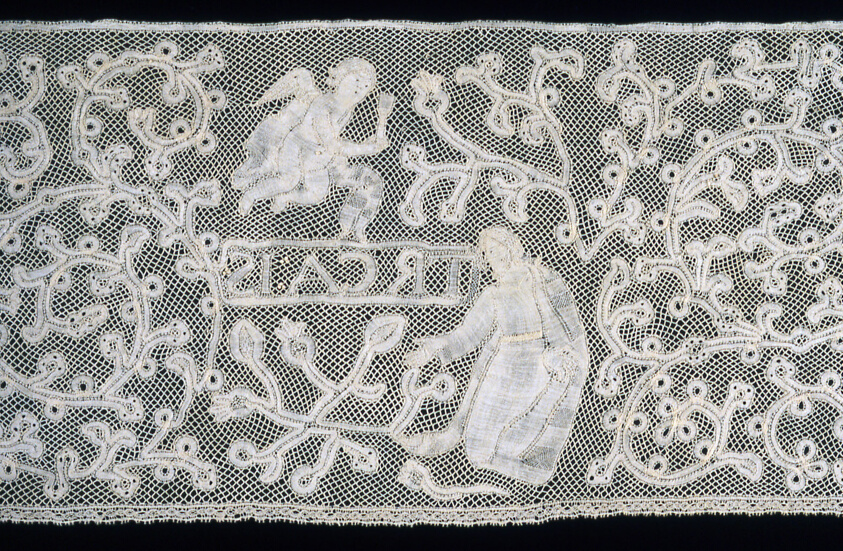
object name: Textile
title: Border (From an Altar Cloth)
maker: Italy, Milan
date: 1725/75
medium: Linen, bobbin part lace; embellished with glass beads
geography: Milan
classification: textile; lace - bobbin